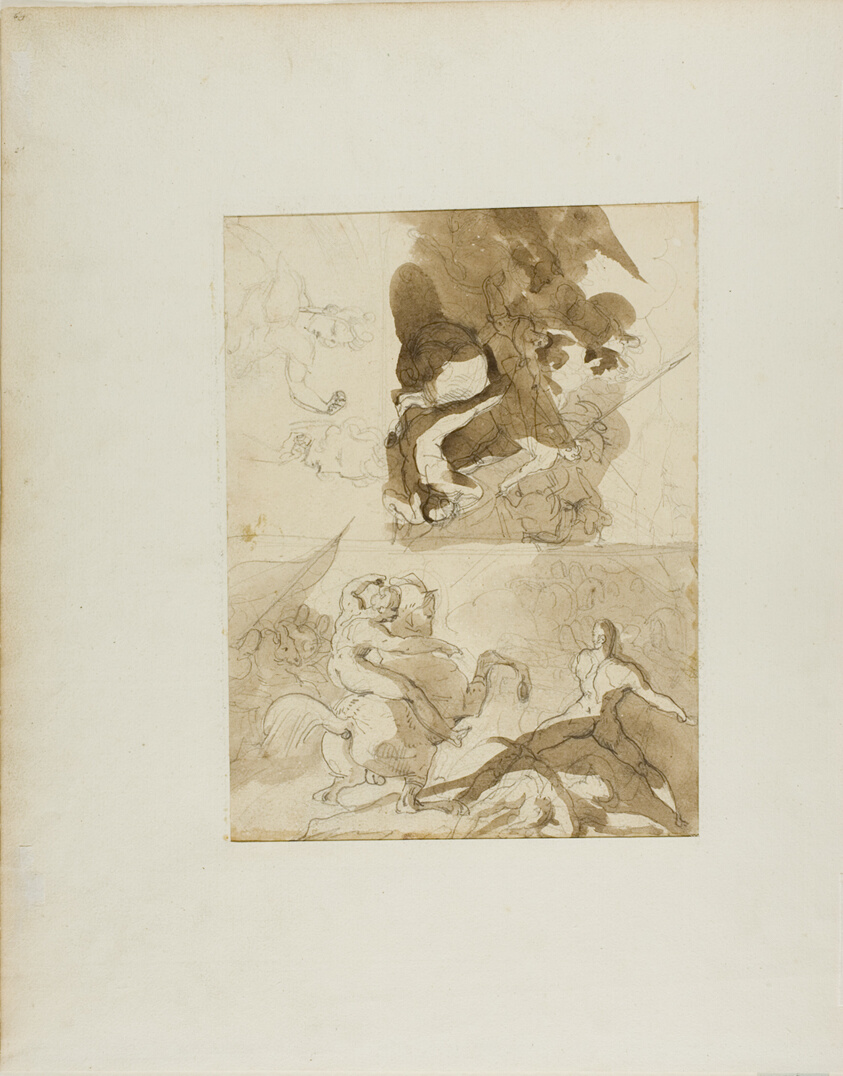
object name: Drawing and Watercolor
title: Sketches for a Cavalry Battle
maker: Jean Louis André Théodore Géricault (French, 1791-1824)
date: 1813/14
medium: Graphite with brush and brown wash on cream wove paper, perimeter mounted on ivory laid paper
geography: France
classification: drawings (visual works); prints and drawing